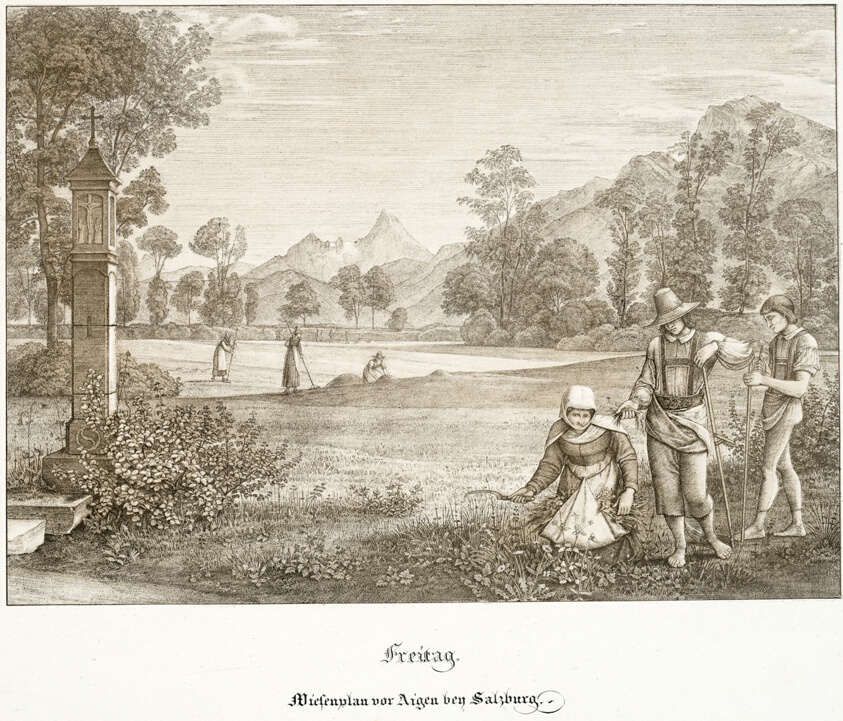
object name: Print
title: Friday: Meadow before Aigen Near Salzburg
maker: Ferdinand Olivier (German, 1785-1841)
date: 1823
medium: Lithograph with tint-stone on white wove paper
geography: Germany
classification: lithograph; print; prints and drawing